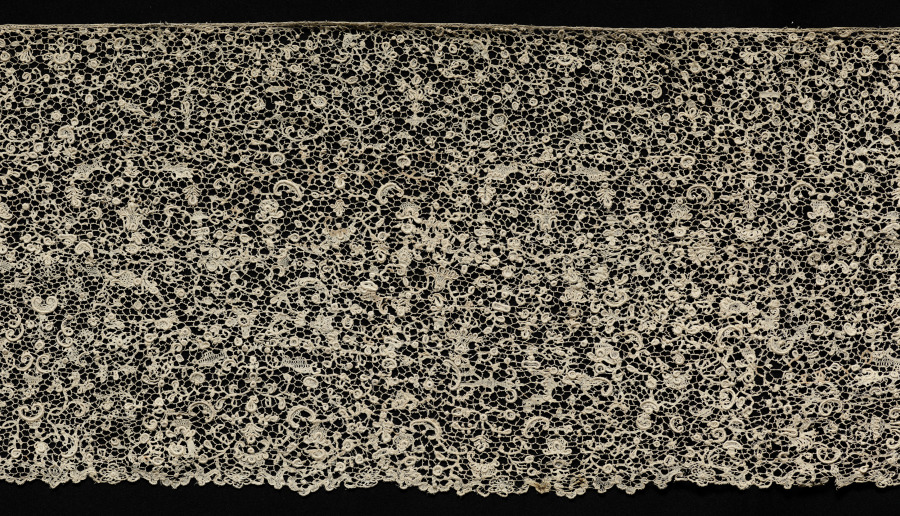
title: Lace Flounce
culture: France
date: 1660–1740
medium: Needle lace (Point de France)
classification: Lace